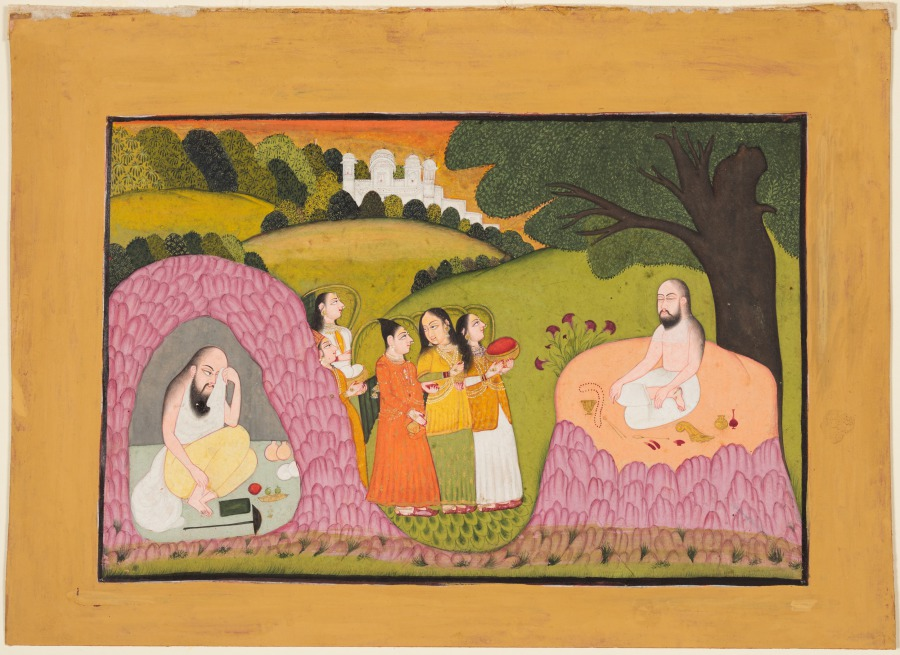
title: Sultan Ibrahim ibn Adham of Balkh Visited by Angels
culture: Northwestern India, Rajasthan, Rajput Kingdom of Bundi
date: c. 1740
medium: gum tempera and gold on paper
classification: Painting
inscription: Verso: Udaipur inventory 21/57 Chughtai signature in both Urdu and English Chughtai seal and number 117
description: Sultan Ibrahim ibn Adham was the King of Balkh in present-day Afghanistan, born around 730, but later abdicated his throne to take up ascetic life in Syria. Sufi legends claim that Ibrahim in the wilderness was fed by angels. In the painting, Ibrahim can be seen in a cave and meditating under a tree, while five angles appear in front of him.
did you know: Two of the angels bring bottles of wine.